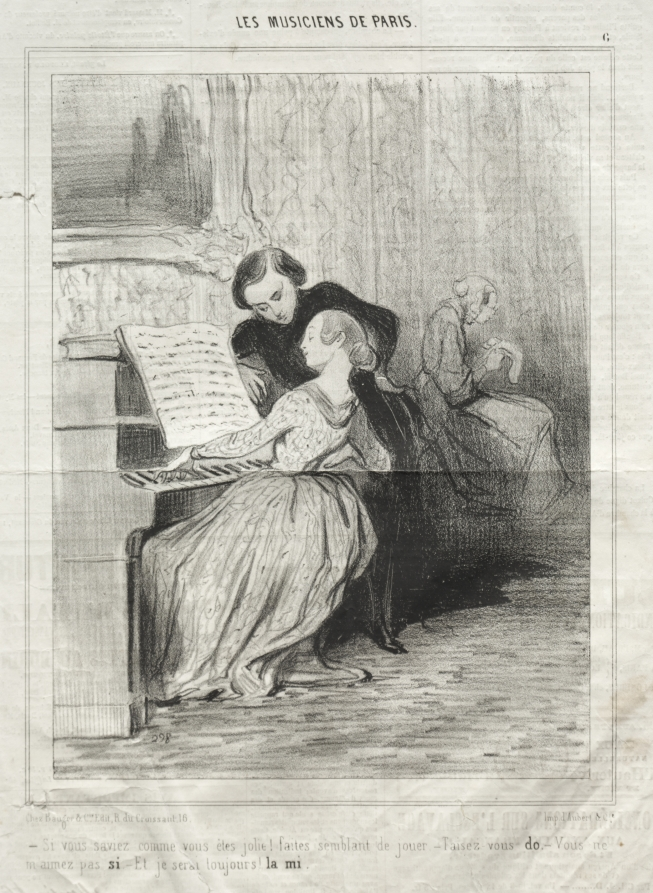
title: If you knew how pretty you are!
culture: France, 19th century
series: The Musicians of Paris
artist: Honoré Daumier (French, 1808–1879)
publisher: Aubert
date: 1841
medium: lithograph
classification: Print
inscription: Above image, printed: LES MUSICIENS DE PARIS. / 6 ; below Image, printed: "- Si vous saviez comme vous êtes jolie! faites semblant de jouer - Taisez-vous do. - Vous ne / m'aimez pas si. - Et je seai toujours! la mi."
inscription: Upper margin, in pencil: Daumier / # 6 ; lower margin, in pencil: D. III.924-III/III ; printed: Chez Bauger & Cie. Edit, R. du Croissant, 16 / Imp. d'Aubert & Cie.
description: This print was published in Le Charivari (March 6, 1843) as plate 6 from the series The Musicians of Paris. The collection had first been published in La Caricature, between August and November, 1841.